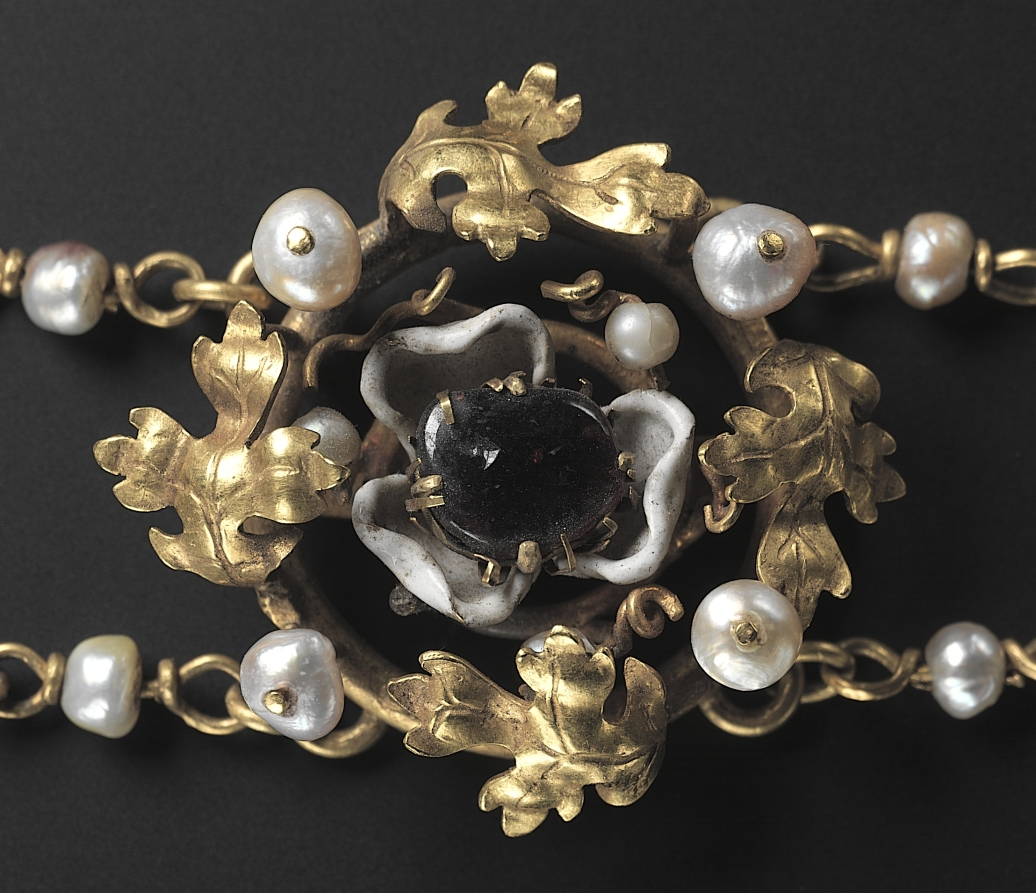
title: Twelve Medallions Mounted as a Necklace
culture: France, Paris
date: c. 1400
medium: enameled gold, precious stones, and pearls; some later additions with modern chain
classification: Jewelry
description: These medallions, which have loops on the backs, must have originally been sewn onto a garment or, more likely, a woman’s headpiece. In spite of the modern chain to which they are now attached, the medallions are unique items of feminine apparel from around 1400. Such items would have been well known at the courts of the Valois in Paris, Bourges, and Dijon. The central medallion with a “white lady” is enameled “in the round”––a new Parisian technique for enameling irregular or three-dimensional surfaces. Such white lady medallions are described in inventories of the period